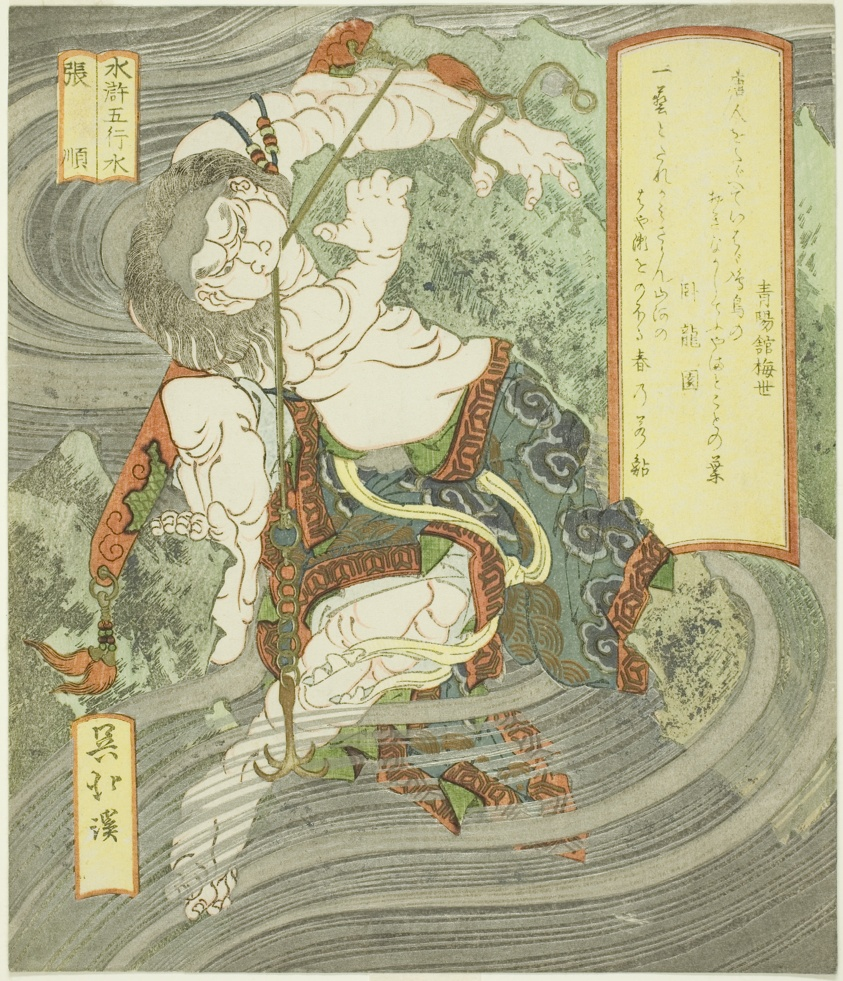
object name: Print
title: Water: Zhang Shun (Mizu, Chojun), from the series "The Five Elements of The Water Margin (Suiko gogyo)"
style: Japanese (culture or style)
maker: Totoya Hokkei (Japanese, 1780–1850)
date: early 1830s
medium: Color woodblock print; shikishiban, surimono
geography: Japan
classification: woodblock print; print; asian art